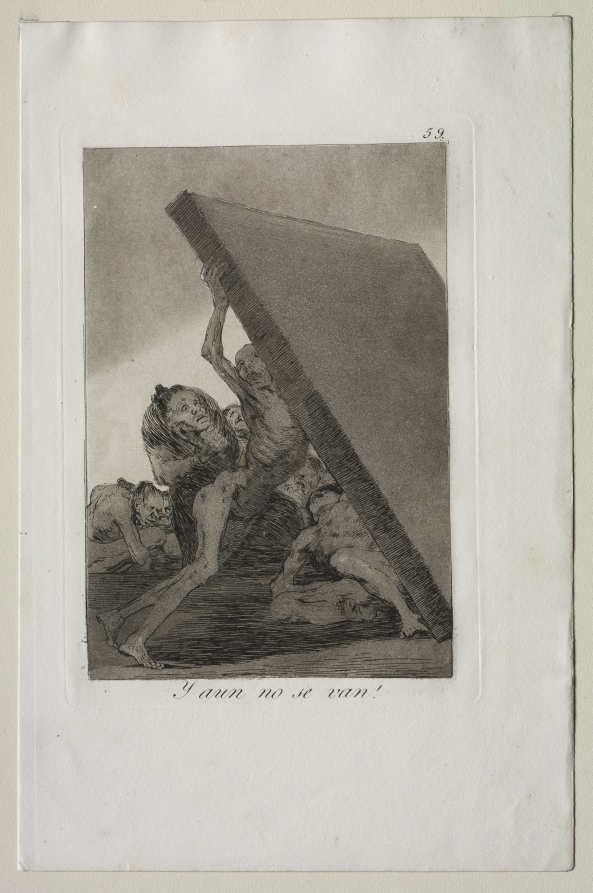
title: And Still They Don't Go!, Plate 59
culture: Spain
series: Los Caprichos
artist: Francisco de Goya (Spanish, 1746–1828)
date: 1799, printed c. 1855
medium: etching and aquatint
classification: Print